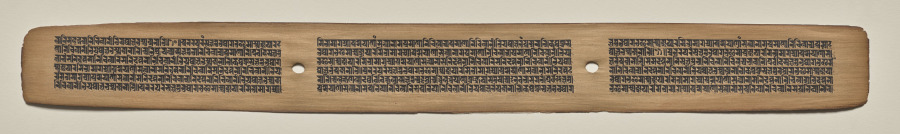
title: Text, Folio 93 (recto), from a Manuscript of the Perfection of Wisdom in Eight Thousand Lines (Ashtasahasrika Prajnaparamita-sutra)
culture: Eastern India, Bihar, Vikramashila Monastery. Painting: Nepal, Kathmandu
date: Sunday, September 14, 1119 (year 239 of the Newar Samvat in the month of Ashvina)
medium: gum tempera and ink on palm leaves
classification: Painting